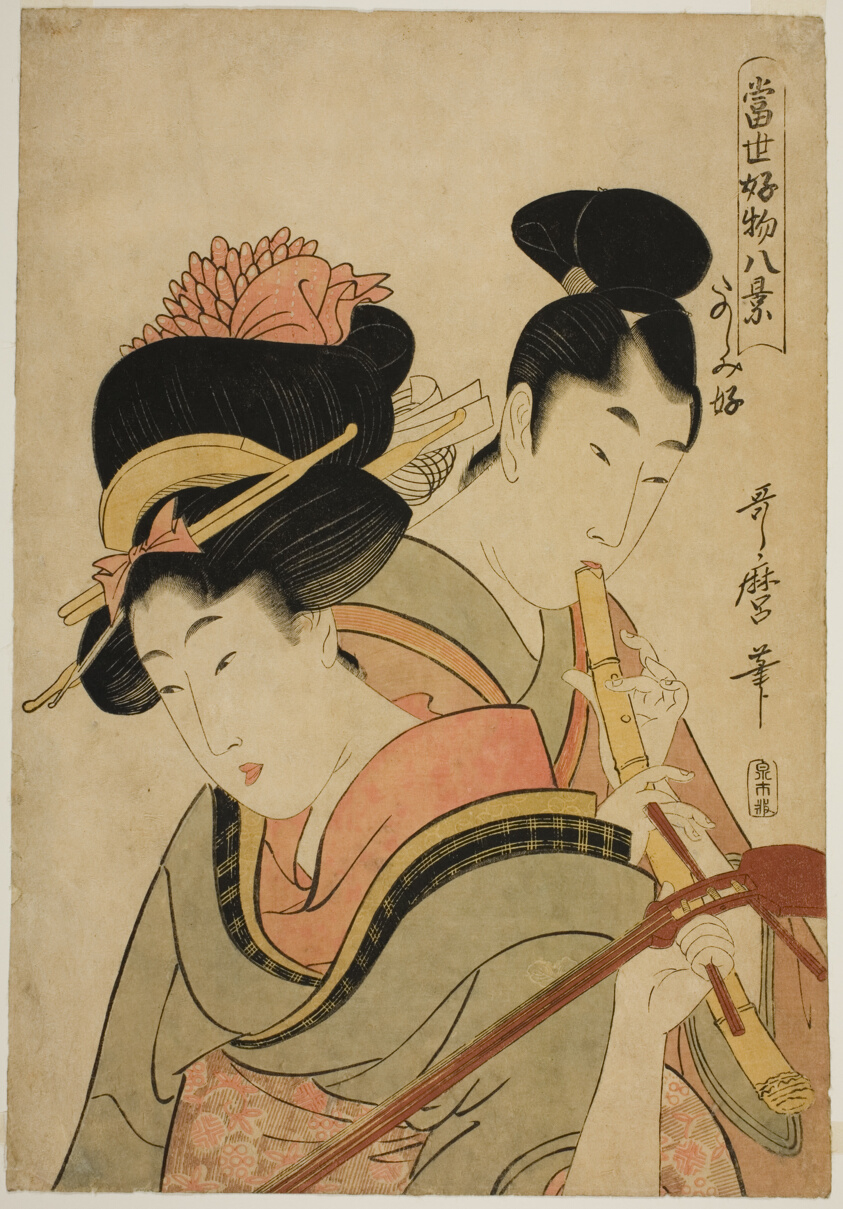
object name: Print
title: Likes Enjoying Herself (Tanoshimizuki), from the series "Eight Views of Favorite Things of Today (Tosei kobutsu hakkei)"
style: Japanese (culture or style)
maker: Kitagawa Utamaro 喜多川 歌麿; Japanese, 1753 (?)-1806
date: c. 1801/02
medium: Color woodblock print; oban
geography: Japan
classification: woodblock print; print; asian art